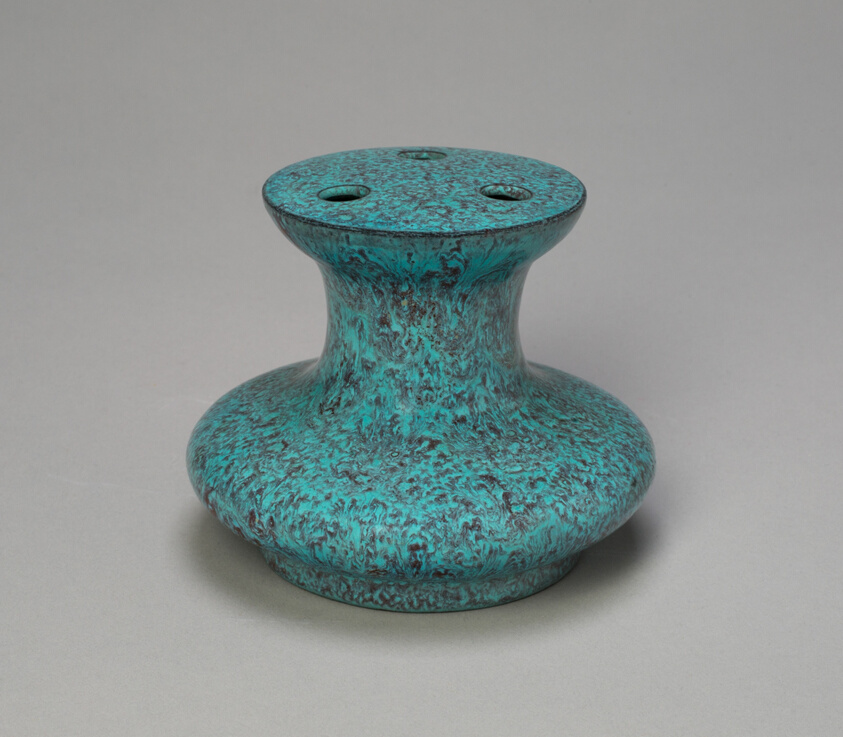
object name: Vessel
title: Holder for Incense Sticks or Flowers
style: Chinese (culture or style)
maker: China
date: Qing dynasty (1644–1911), Yongzheng reign mark and period (1723–1735)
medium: Porcelain with robin’s egg blue glaze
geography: China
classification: household accessory; porcelain; asian art; ceramics; vessel